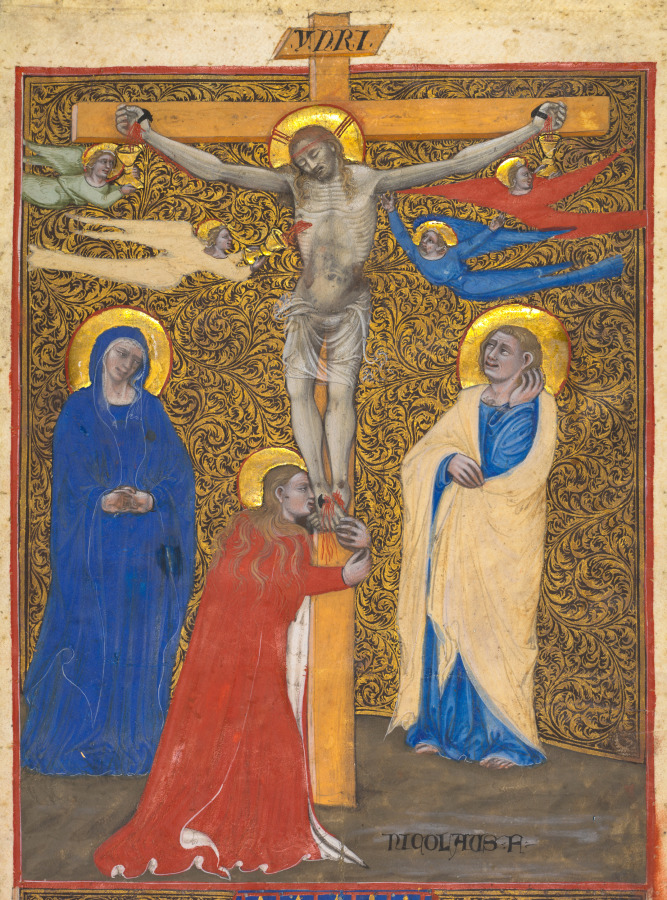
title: Single Leaf from a Missal: The Crucifixion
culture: Italy, Bologna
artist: attributed to Nicolò da Bologna (Italian, c. 1325–1403)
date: c. 1390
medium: ink, tempera, and gold on vellum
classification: Manuscript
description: Symbolizing the Eucharist, this leaf depicts angels holding chalices to collect blood from Christ's five wounds.